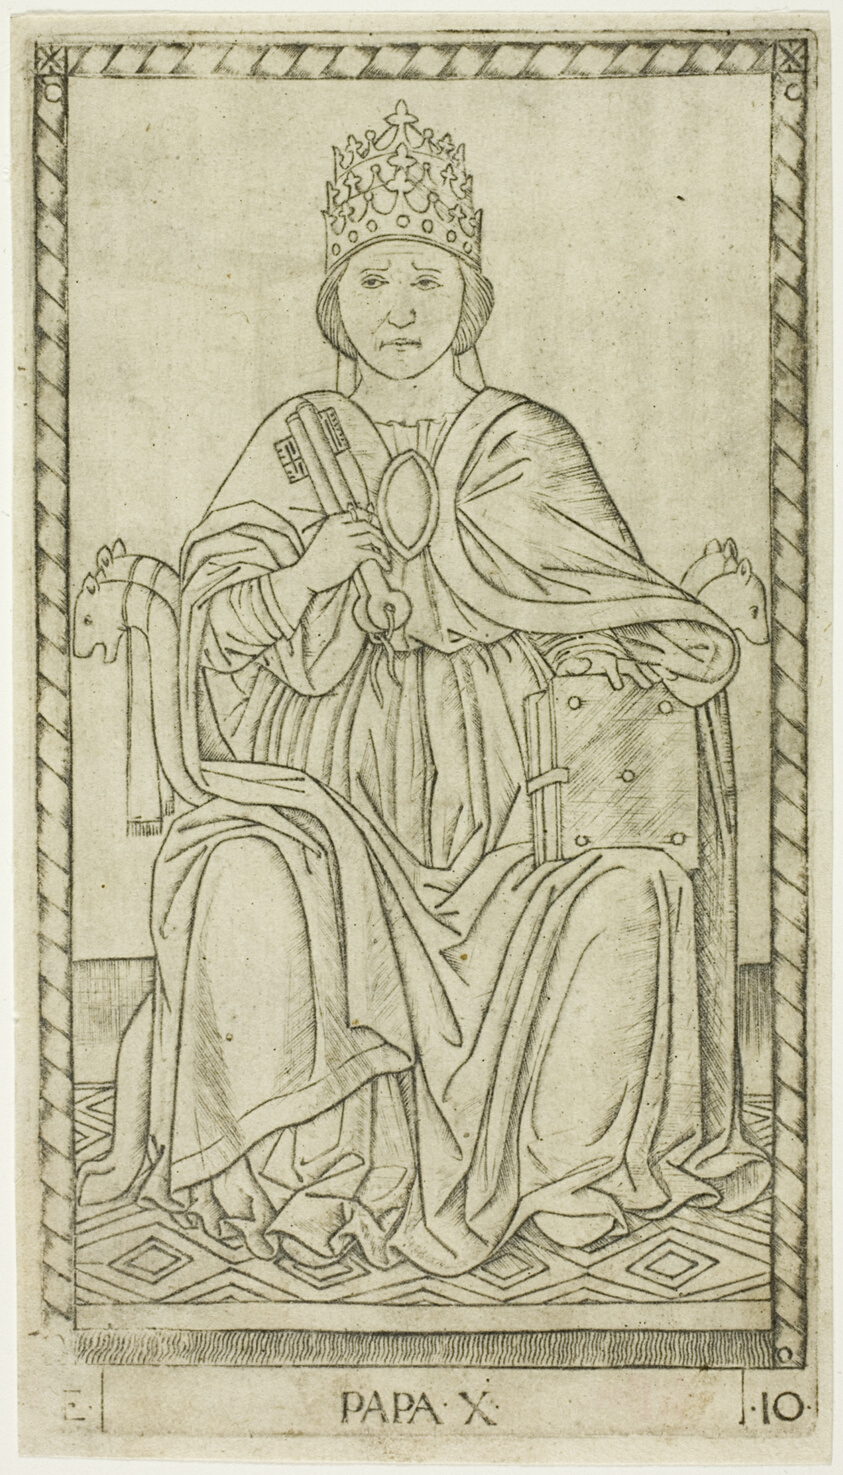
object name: Print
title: The Pope, plate ten from The Ranks and Conditions of Men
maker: Master of the E-Series Tarocchi (Italian, active c. 1465)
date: c. 1465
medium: Engraving on paper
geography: Italy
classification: engraving; print; prints and drawing